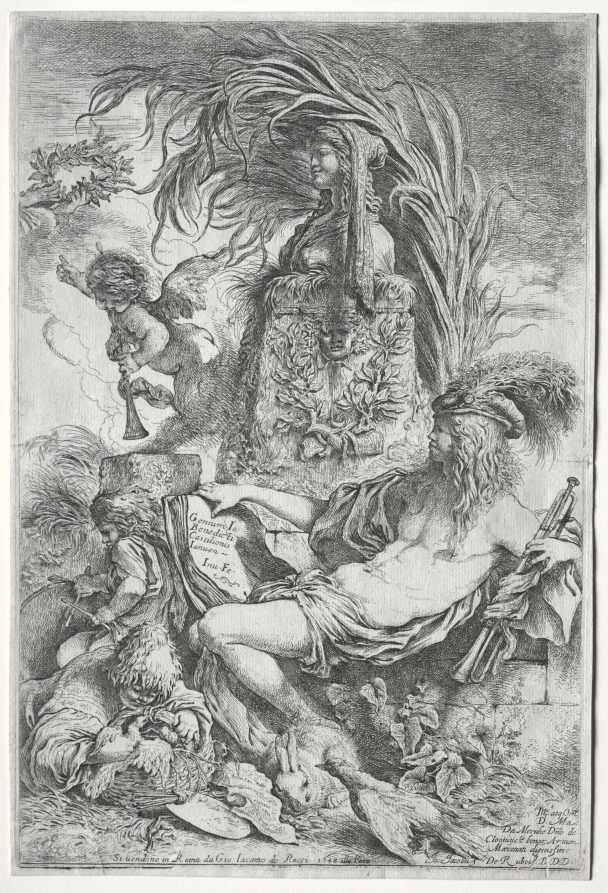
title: The Genius of Castiglione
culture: Italy, 17th century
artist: Giovanni Benedetto Castiglione (Italian, 1609–1664)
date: 1648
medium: etching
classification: Print